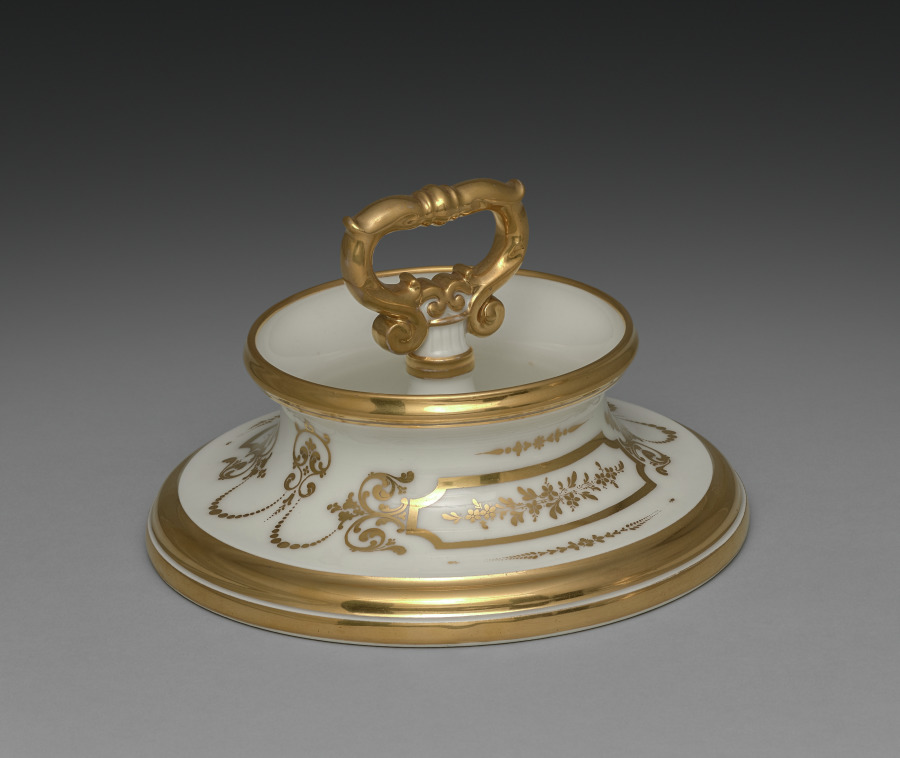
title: Lid for an Ice Cream Pail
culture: France, Paris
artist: Factory of Jacob-Petit (French, 1830–1865)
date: c. 1840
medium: gilt porcelain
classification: Ceramic